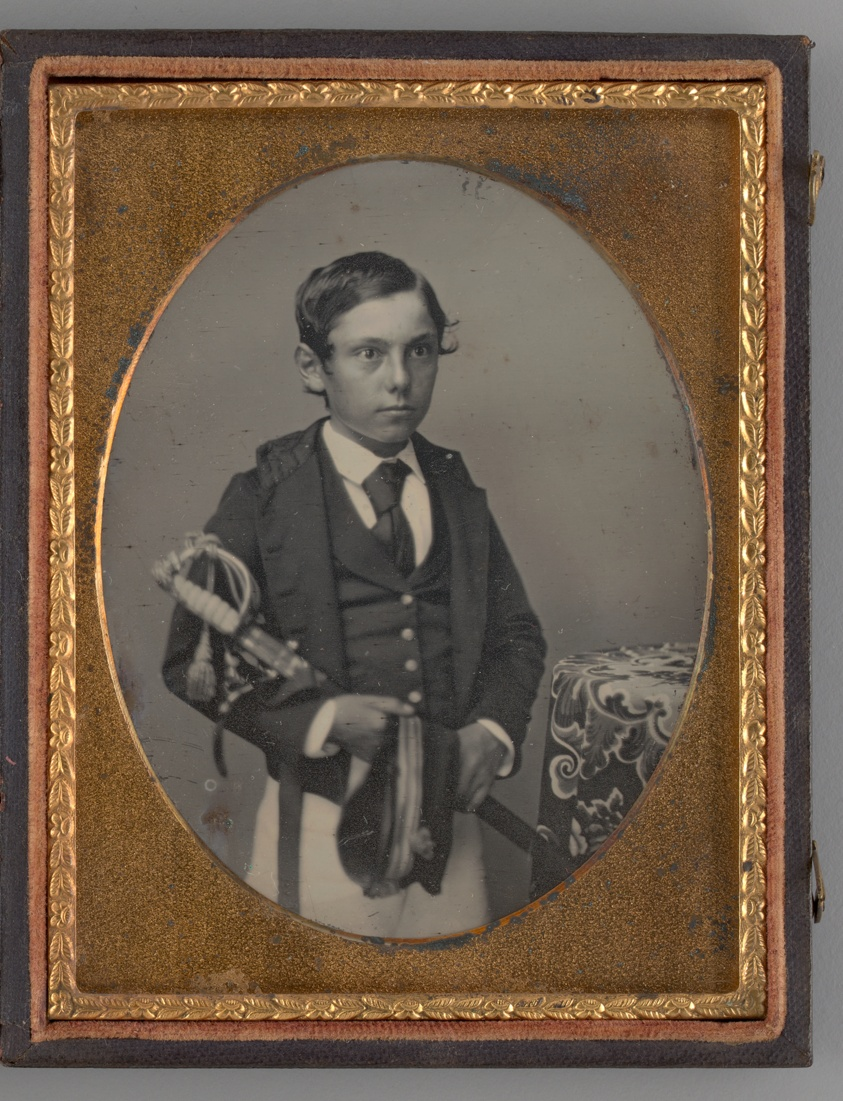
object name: Photograph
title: Untitled (Portrait of a Boy Holding a Sword)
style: 19th century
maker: Unknown maker; American, 19th century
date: 1859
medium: Daguerreotype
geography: United States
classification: portrait; photograph; photographic process; photography; portrait; daguerreotype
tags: lundberg collection, portraits: male subject, portrait, Male, children, boys, portraits, portraits: child subject